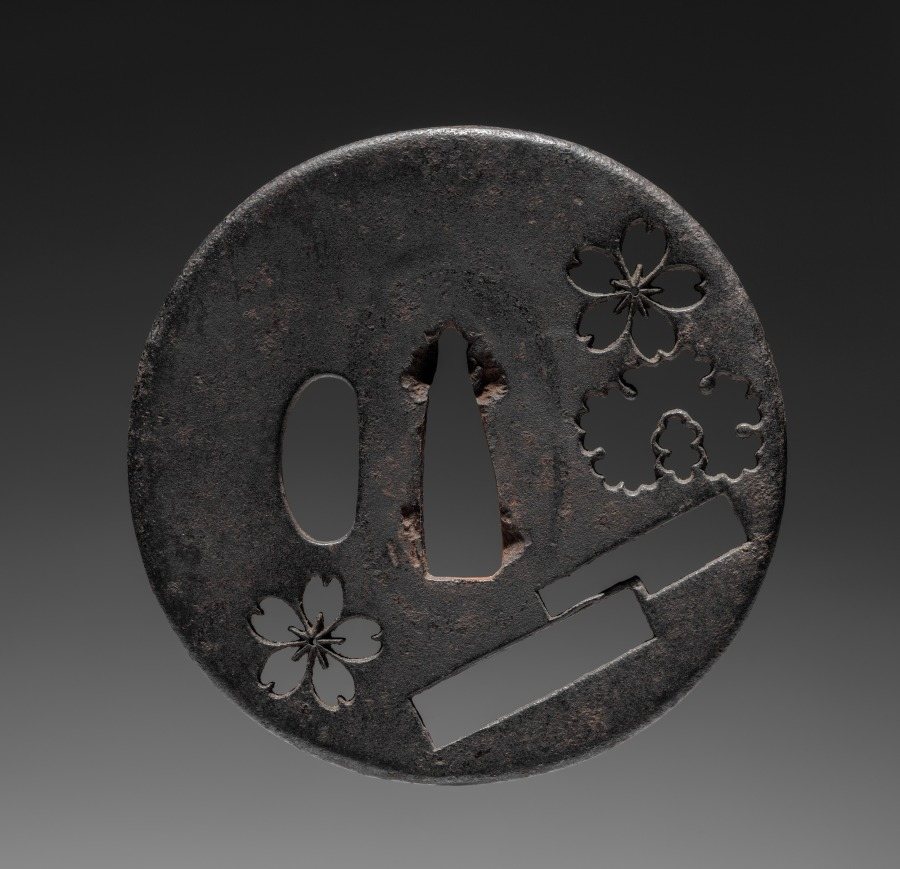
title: Sword Guard (Tsuba)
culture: Japan, possibly Edo period (1615-1868)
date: c. 1615–1868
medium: iron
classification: Arms and Armor